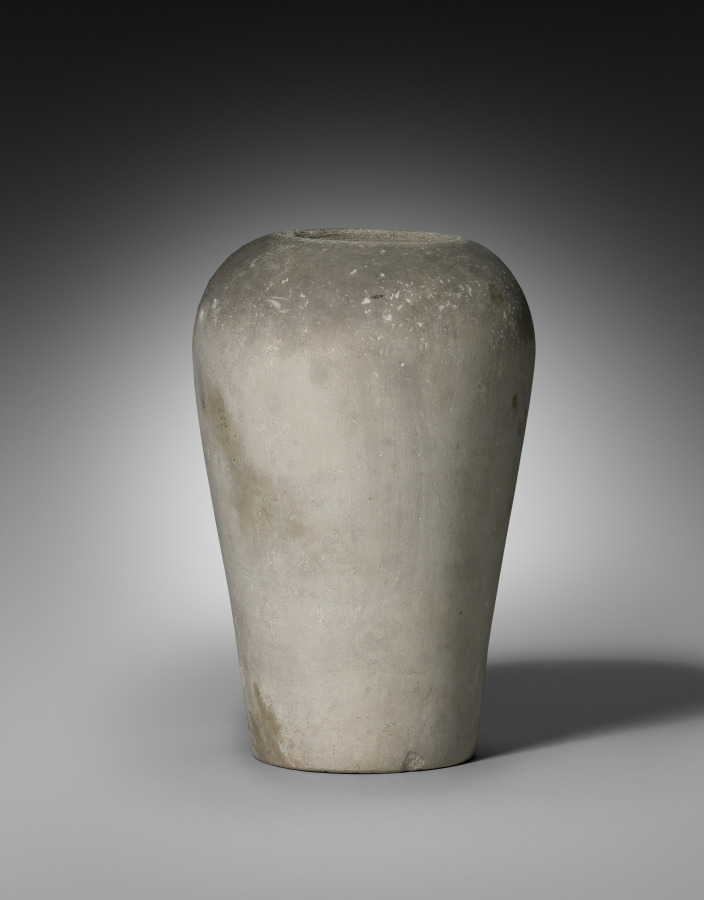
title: Canopic Jar with Lid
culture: Egypt, New Kingdom (1540–1069 BCE), Dynasty 18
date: 1540–1296 BCE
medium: limestone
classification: Funerary Equipment